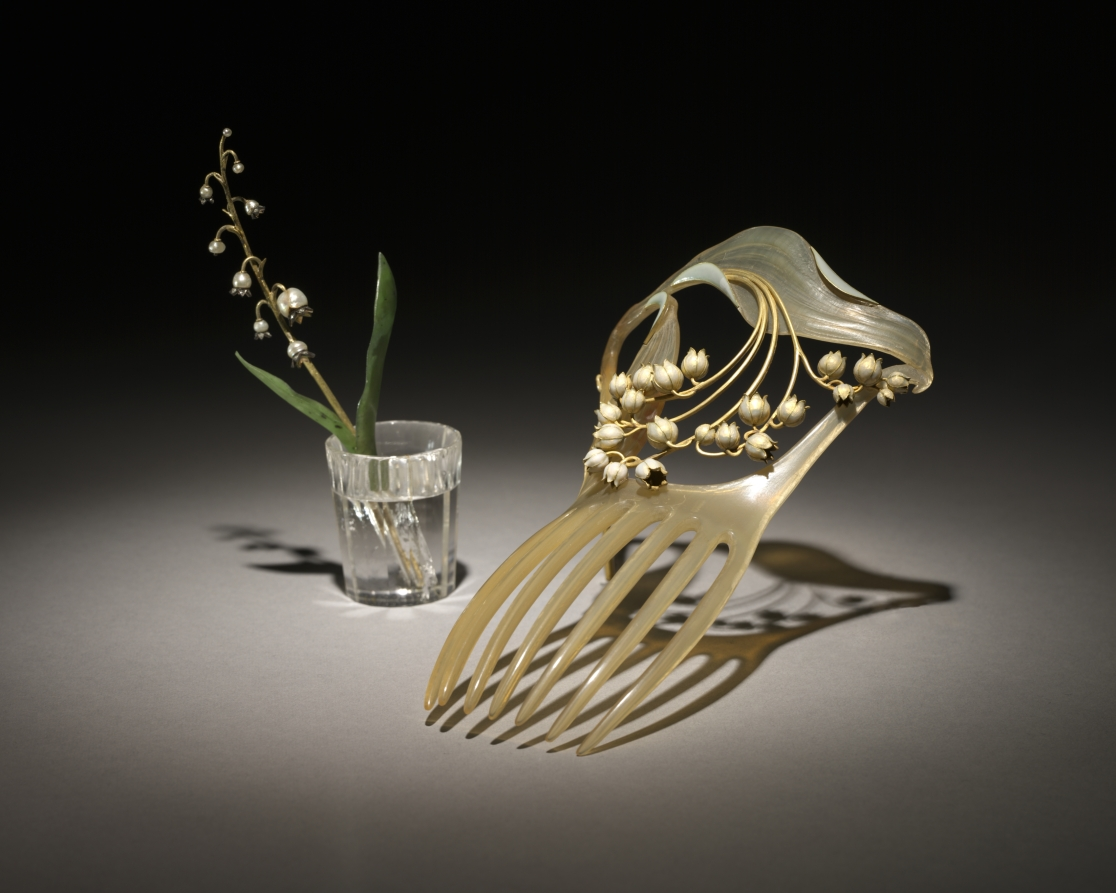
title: Flower Study of a Lily of the Valley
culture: Russia, St. Petersburg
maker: House of Fabergé (Russian, 1842–1918)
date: c. 1885–1915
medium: pearls, diamonds, jade, rock crystal, silver, gold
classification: Miscellaneous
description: This flower study resembles a stem of lily-of-the-valley. Fabergé’s inspiration for his flower studies is said to have come from the floral brooches of precious stones that were made in the 1700s for Catherine the Great as well as from the Japanese art of flower arranging, known as ikebana. Small and delicate, Fabergé’s flower studies were given as intimate gifts to friends by the tsarina and others in the court. She also liked to take them around to wherever the imperial family was residing as a reminder of spring during the harsh Russian winters.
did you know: The stems of Fabergé’s flower studies are set into little basins carved from rock crystal to resemble pots of water.